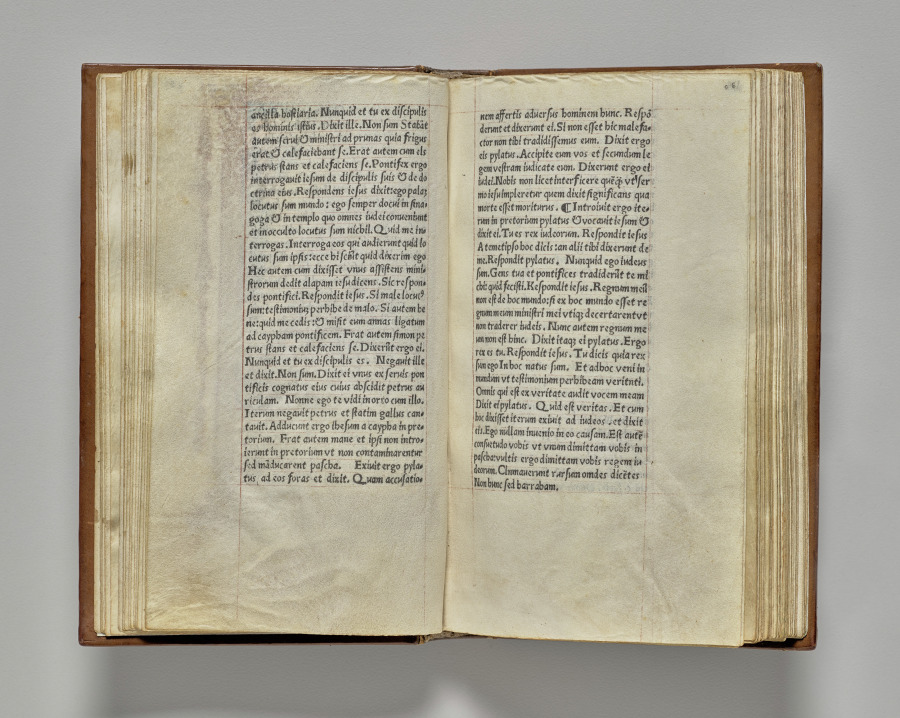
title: Printed Book of Hours (Use of Rome): fol. 95v, Text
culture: France, Paris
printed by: Guillaume Le Rouge (French, Paris, active 1493–1517)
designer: Master of the Très Petites Heures of Anne of Brittany (French, Paris, active c.1480–1510)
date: 1510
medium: 112 printed folios on parchment, bound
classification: Bound Volume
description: Illustrated prayer books called books of hours remained popular with Europe’s elite well into the era of printing technology. This example belongs to a printed edition of five by the Parisian printer and engraver Guillaume Le Rouge, dating to 1510. Though printed on vellum (not paper), its 62 engraved pictures were hand-colored by an illuminator much like a traditional manuscript. By the mid-1480s, Paris was the center of production for books of hours with printed texts and engraved ornament. This book is therefore a hybrid fusing two distinct production methods—illumination and printing—representing the waning phase of the illuminator’s art prior to the complete transformation to printed books.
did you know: The workshop of Guillaume le Rouge was in the Neuve Notre-Dame near Paris’s Notre Dame Cathedral.